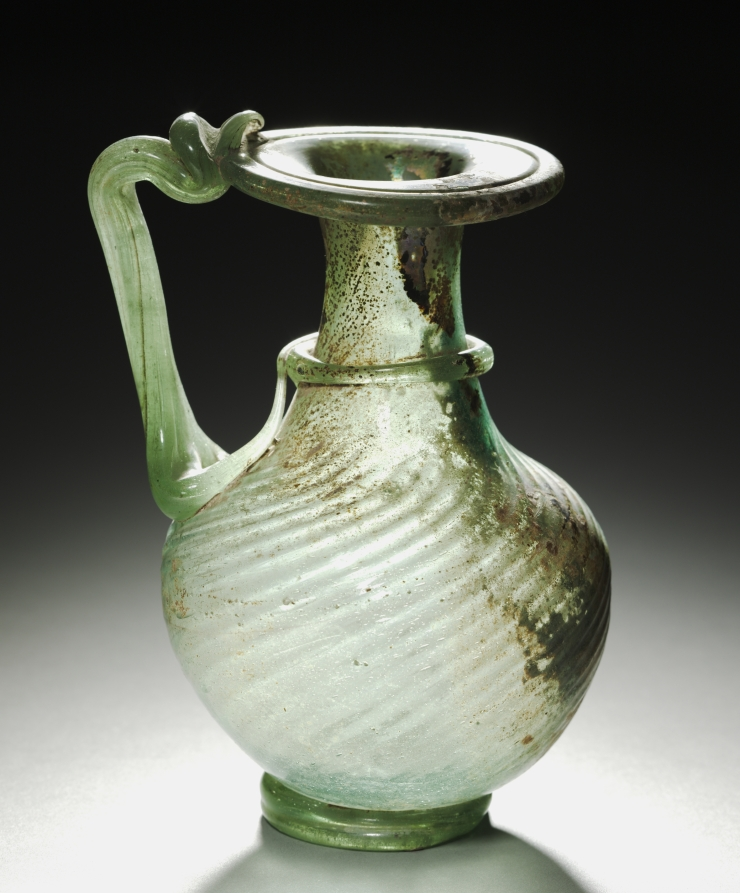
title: Pitcher with Handle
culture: Eastern Mediterranean, Roman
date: 300s CE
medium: glass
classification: Glass